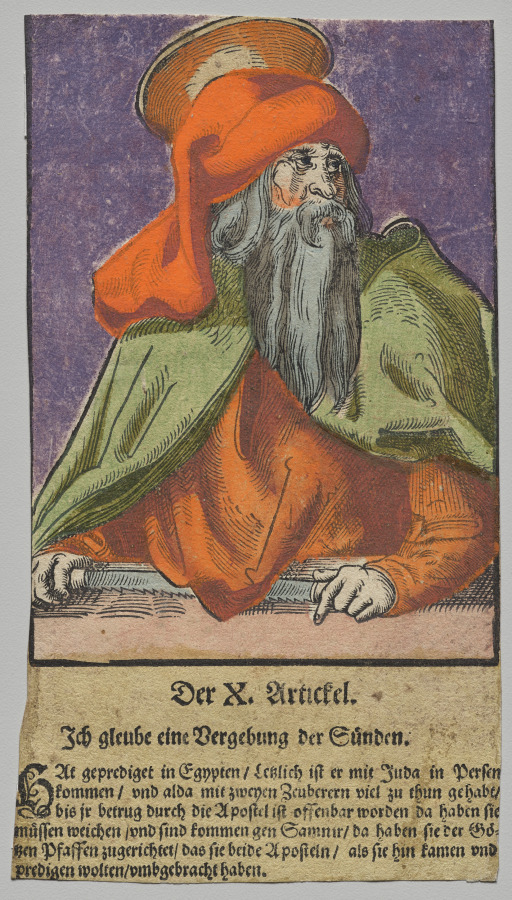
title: Simon from Christ, the Apostles, and Saint Paul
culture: Germany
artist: Lucas Cranach the Elder, After (German, 1472–1553)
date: 1563/64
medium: Woodcut with letterpress text, hand colored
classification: Print